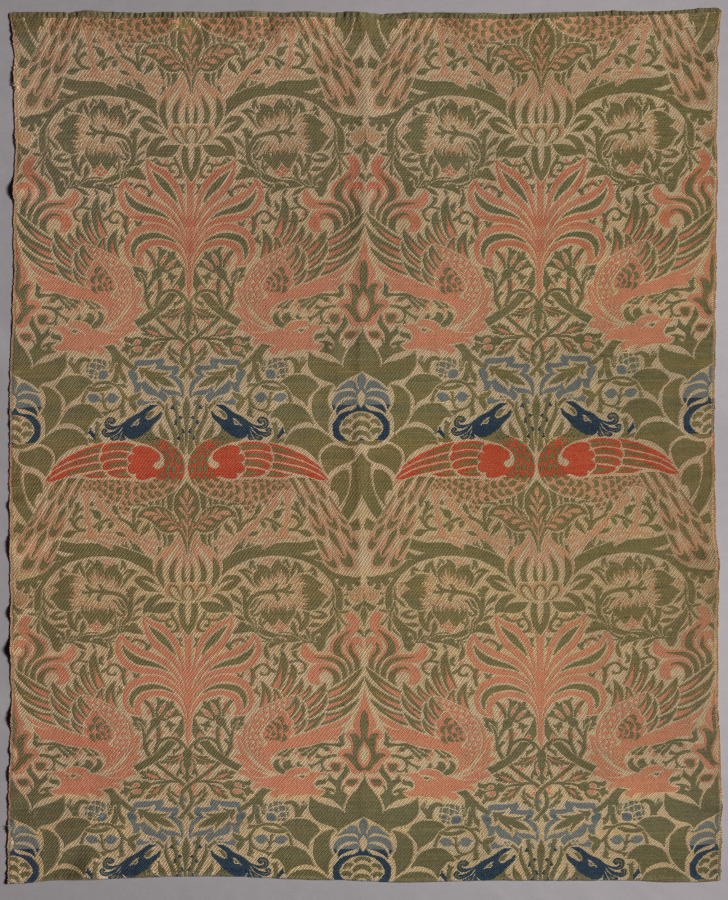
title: Peacock and Dragon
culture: England, Surrey, Merton Abbey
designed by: William Morris (British, 1834–1896)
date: 1878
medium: weft-faced compound twill; wool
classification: Textile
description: Morris sought to produce textiles that could function as he imagined medieval wall hangings had, bringing warmth to stone-cold rooms. Boldly designed with soothing colors in thick wool, Peacock and Dragon is the closest Morris came to achieving this ideal. In the same year he designed this textile, Morris visited the shop of the London dealer Vincent Robinson, where he saw a room re-created from Damascus, “all vermillion and gold and ultramarine, very beautiful, and is just like going into the Arabian nights.” It partly inspired the exotic motifs seen here. This design was one of the most popular among Morris’s customers; it was available in five colorways.